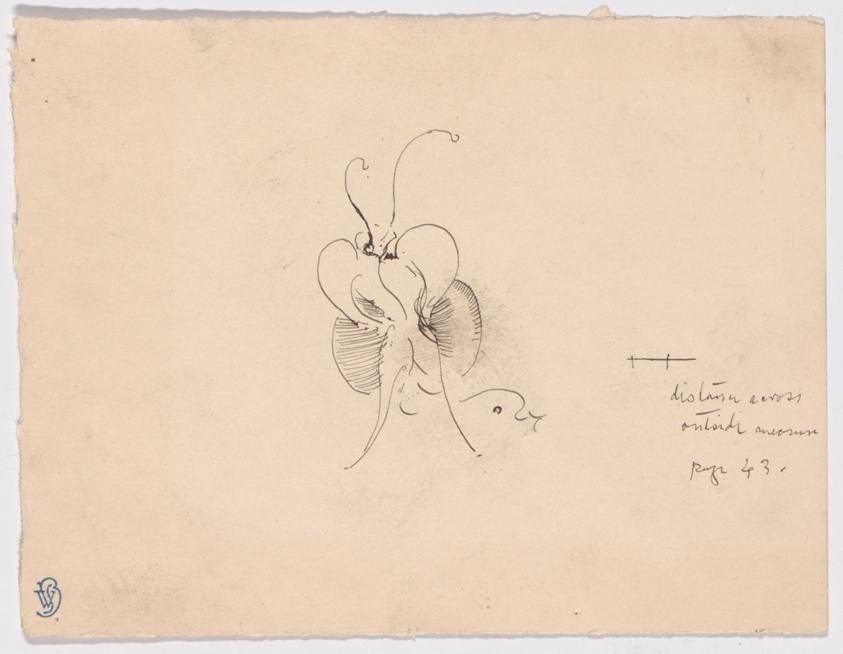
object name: Drawing and Watercolor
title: Butterfly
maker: James McNeill Whistler (American, 1834-1903)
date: 1898/99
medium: Pen and black ink on cream wove card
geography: United States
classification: pen and ink drawings; drawings (visual works); prints and drawing; paper